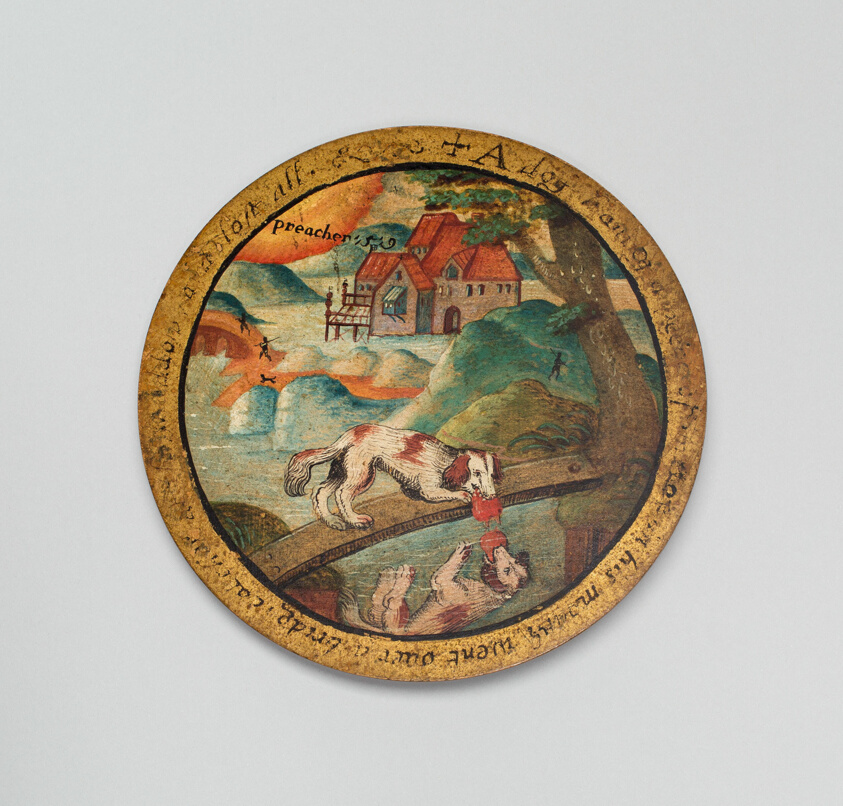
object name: Decorative Arts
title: Trencher with a Scene from Aesop's Fables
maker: England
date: c. 1600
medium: Sycamore, painted and gilded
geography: England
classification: wood; european decorative arts; decorative arts